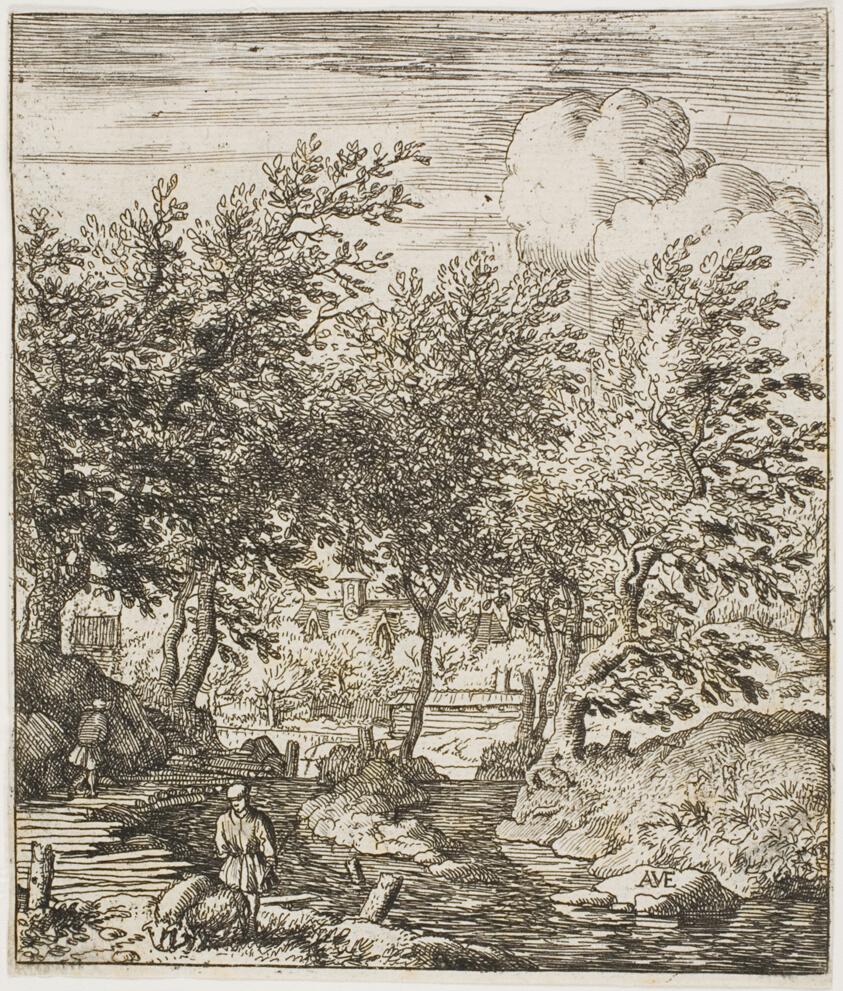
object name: Print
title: The Swineherd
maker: Allart van Everdingen; Dutch, 1621-1675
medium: Etching on paper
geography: Holland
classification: etching; print; prints and drawing